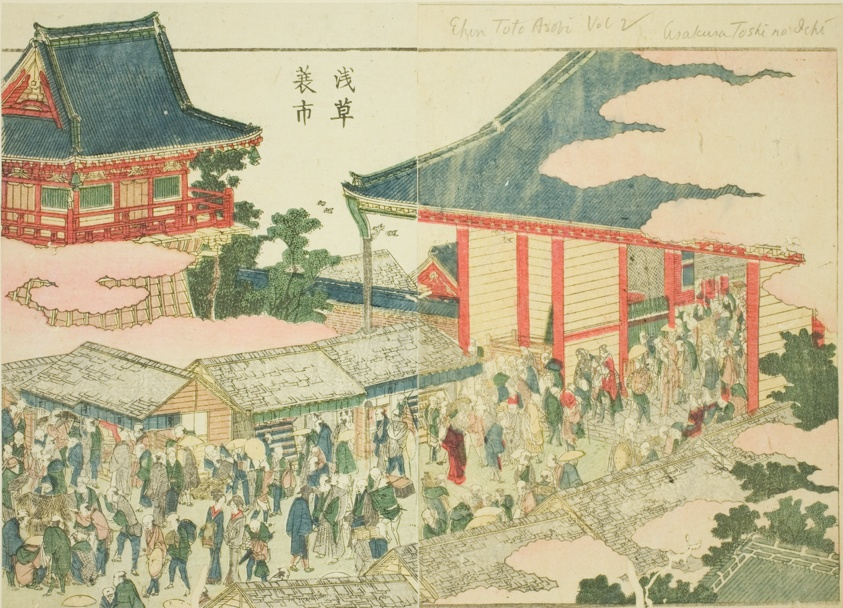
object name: Print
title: The End-of-year Market at Asakusa (Asakusa mino ichi), from the illustrated book "Picture Book of Amusements of the East (Ehon Azuma asobi)"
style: Japanese (culture or style)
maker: Katsushika Hokusai 葛飾 北斎; Japanese, 1760-1849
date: c. 1802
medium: Color woodblock print; double-page illustration from book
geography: Japan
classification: woodblock print; print; asian art